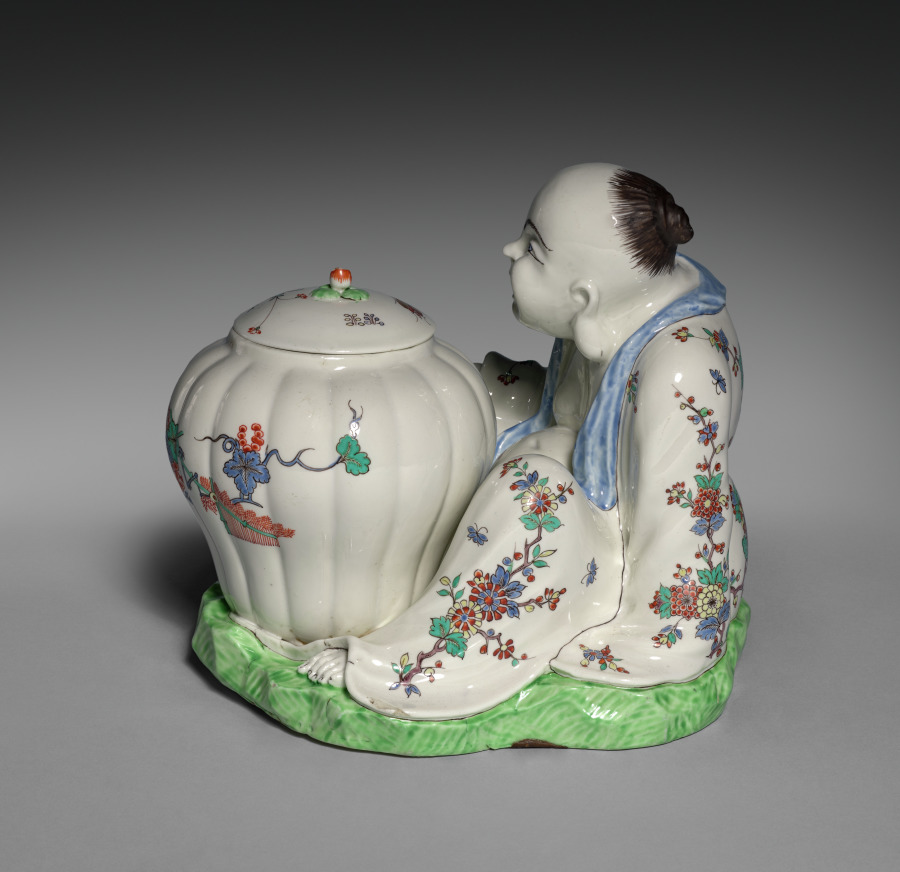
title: Figure of Budai or Hotei with Jar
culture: France, Chantilly, 18th century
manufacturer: Chantilly Porcelain Factory (French)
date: c. 1735–40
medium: Tin-glazed soft-paste porcelain with enamel decoration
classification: Ceramic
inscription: [Mark of the Chantilly factory (red hunting horn), on bottom]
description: The production of decorative figures like this one, referred to as magots or pagodes in European texts, was the result of an 18th-century European interest in Chinese and Japanese culture and porcelain. Budai, pronounced Hotei in Japanese, was a semilegendary Chinese monk known in Japan through the transmission of Chan Bhuddism. This figure’s decoration with multicolor overglaze enamels on a milky-white is typical of Japanese Kakiemon style.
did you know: In 1735, the Chantilly factory was given a 25-year royal privilege for the manufacture of objects that imitated Japanese porcelain.